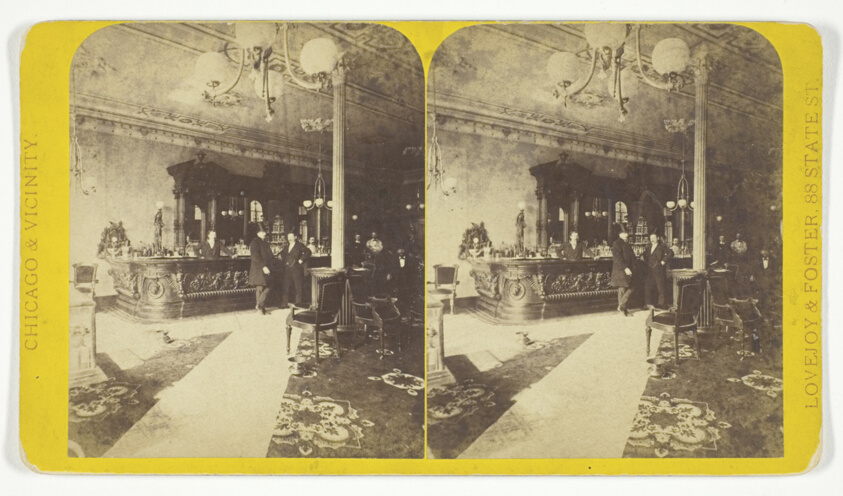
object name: Photograph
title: Office Tremont House, Cor. Lake and Dearborn Sts.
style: 19th century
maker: Lovejoy & Foster; American, active 1870s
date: 1850/71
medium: Albumen print, stereo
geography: Chicago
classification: photography; photograph; albumen silver print; stereograph (albumen)